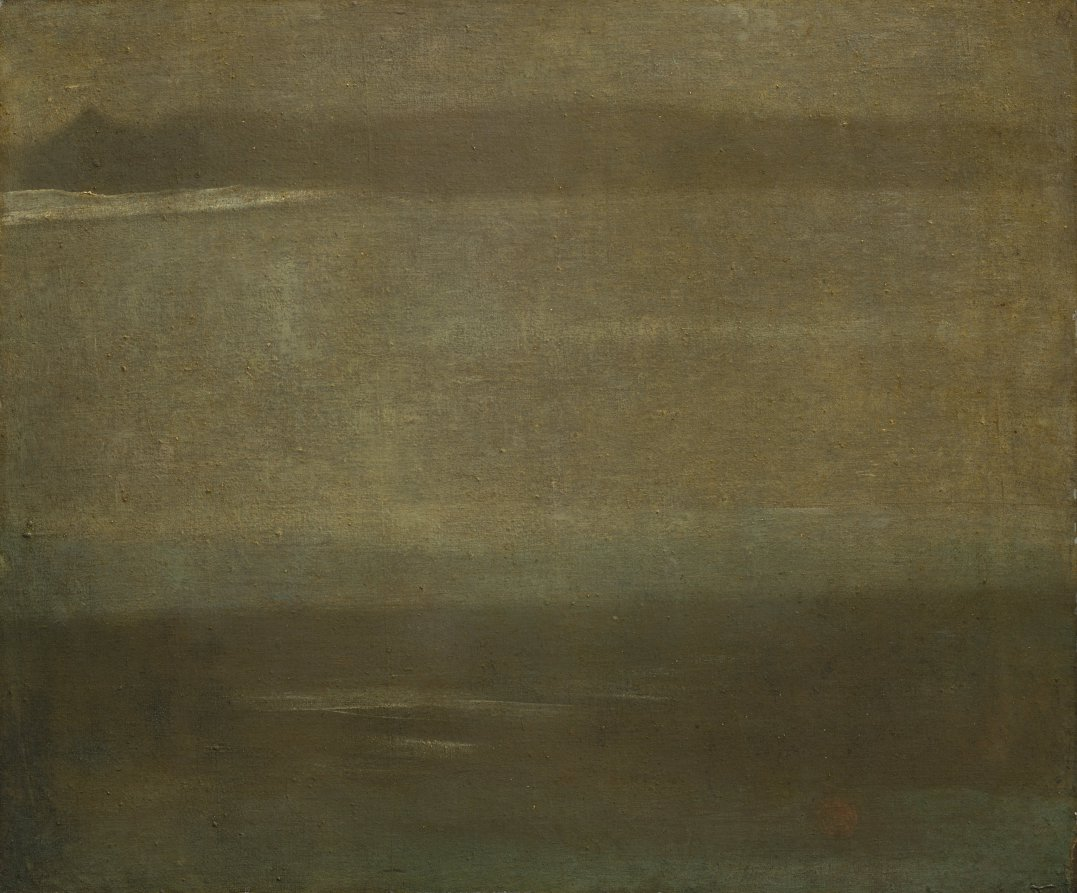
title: Gray and Silver: A Nocturne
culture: England, 19th century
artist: Walter Greaves (British, 1841–1930)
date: c. 1880–1900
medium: oil on canvas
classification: Painting